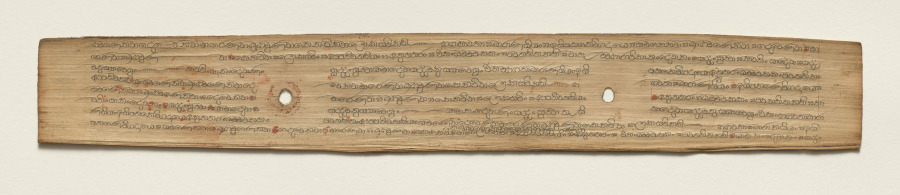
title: Leaf from a Buddhist Manuscript (verso)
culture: Sri Lanka, Singhalese, Late 17th century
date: c. 1700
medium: fiber paper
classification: Manuscript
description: Palm leaf material is still used for manuscripts in Sri Lanka. The palm leaves are prepared first by boiling them, drying them in the sun, and then rubbing them with oils. Scribes then use a metal stylus to incise the text. Then charcoal powder is wiped across the pages, filling in only the inscribed lines.